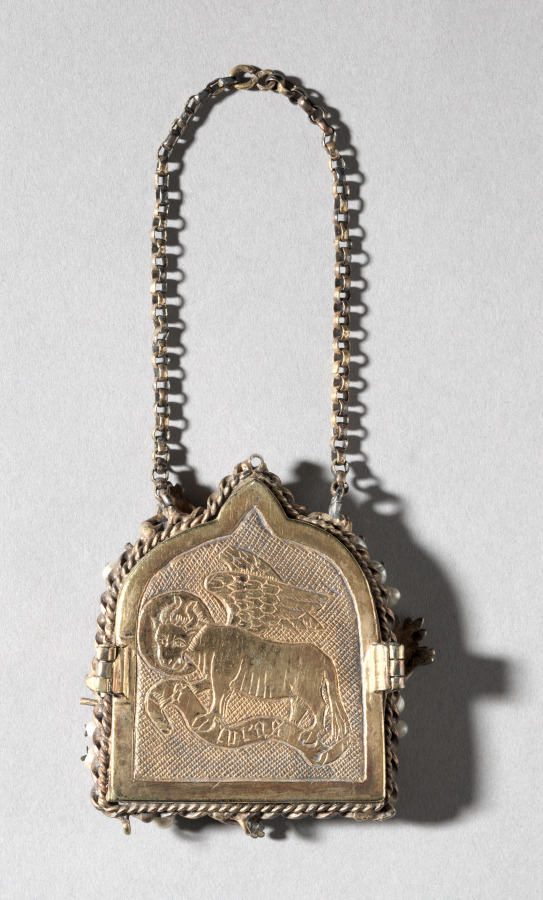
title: Pendant Icon with the Virgin "Dexiokratousa" and Frame with Winged Bull of Saint Luke on the back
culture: Byzantium (pendant); Germany, Aachen (frame), Byzantine period, 12th century (pendant); Byzantine period, 14th century (frame)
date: pendant 1100s; frame mid-1300s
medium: steatite, gilt silver, pearls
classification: Glyptic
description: This small-scale Byzantine icon depicts a half-length figure of the Virgin holding the Christ child. When the icon was mounted in its present frame by a German artist in the 14th century, it was considered to be an authentic portrait painted by Saint Luke. This claim, made in an inscription on the frame, is further emphasized by the ox, Saint Luke’s symbol, engraved on the frame’s reverse.